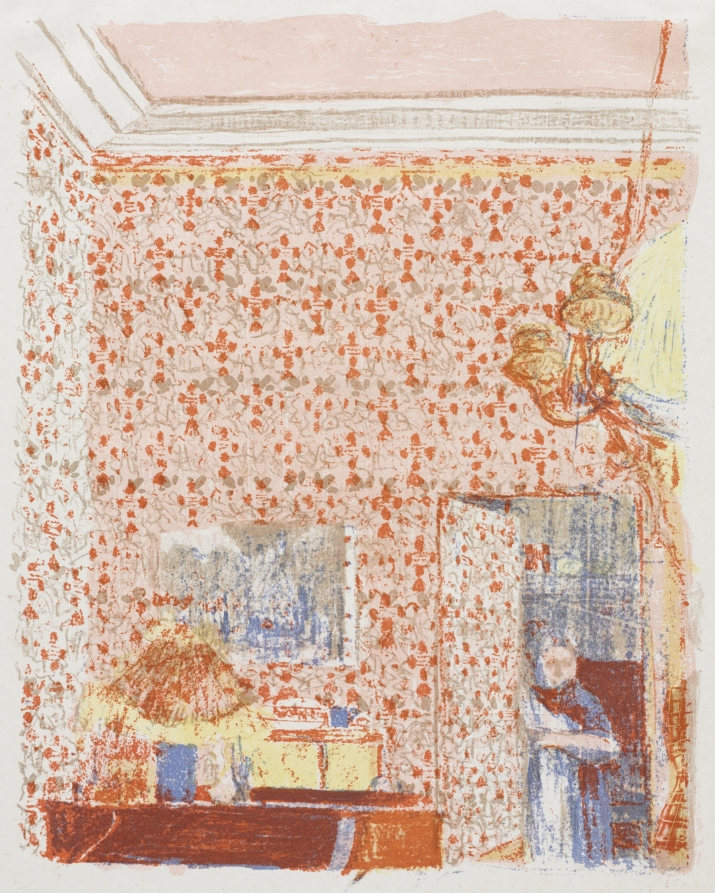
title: Interior with Pink Wallpaper I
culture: France, 19th century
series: Landscapes and Interiors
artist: Édouard Vuillard (French, 1868–1940)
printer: Auguste Clot (French, 1858–1936)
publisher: Ambroise Vollard (French, 1867–1939)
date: 1899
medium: color lithograph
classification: Print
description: The optical beauty of the patterning and luscious color of Interior with Wallpaper I, II, and III distracts from their ambivalent undercurrents. Across the three sheets, Vuillard creates an airless enclosure in which the wallpaper replicates itself, metastasizing across the surface and threatening the figures partially glimpsed through interior doors. Hidden figures recur in Vuillard’s work, adding an element of the uncanny to familiar settings.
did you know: Vuillard’s mother, Madame Marie Vuillard, appeared in over 500 of her son’s paintings and prints made between the 1880s and 1920s.